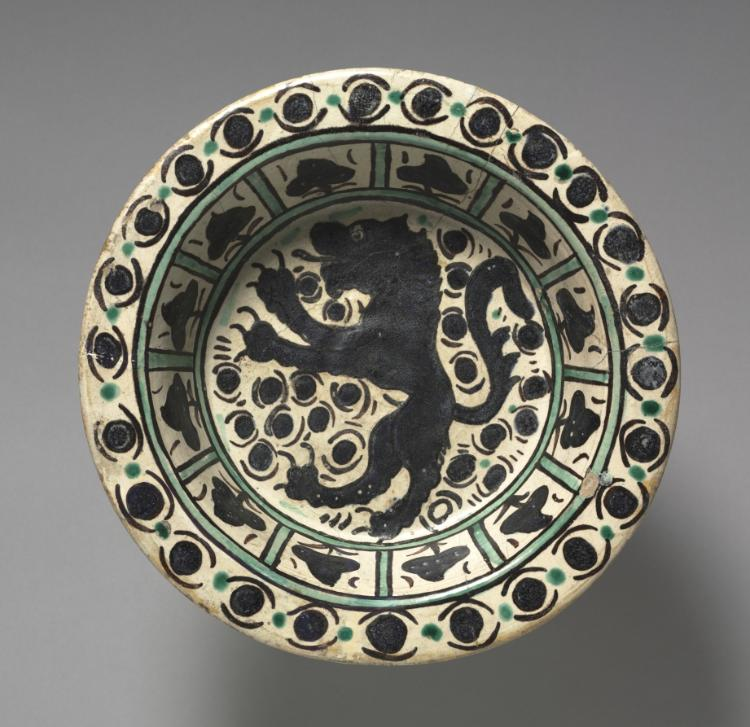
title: Dish with a Lion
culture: Italy, Florence, 15th century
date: c. 1430–50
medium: tin-glazed earthenware (maiolica)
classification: Ceramic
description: This dish is representative of the rustic type of maiolica produced in Italy before 1450. The design is much inspired by contemporary Spanish earthenware. The surface of the dish is painted in a cobalt blue impasto technique known as zaffera a rilevo. Lions frequently adorn wares decorated in this technique and are particularly appropriate as a Florentine motif-they probably refer to that city's lion emblem.